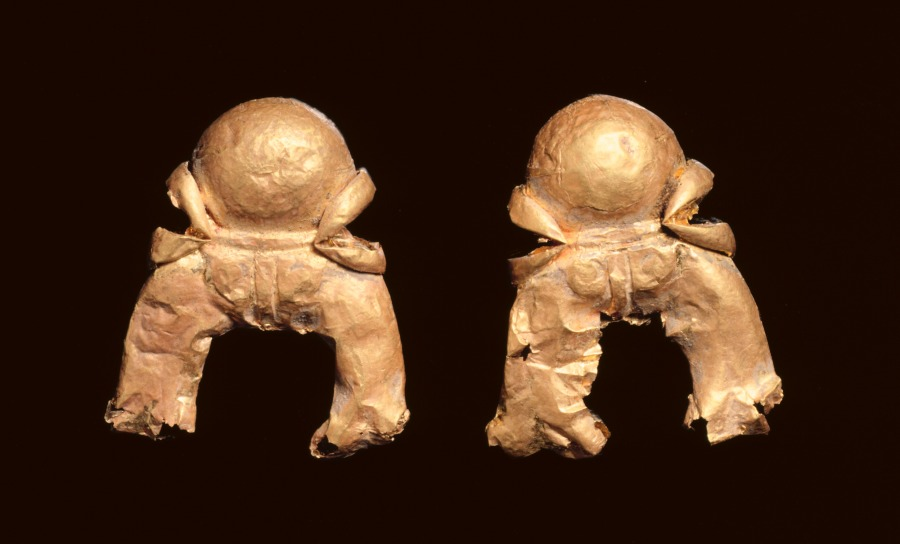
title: Pair of Pendants in the Shape of an Auspicious Symbol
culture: India, Shunga period (185–78 BCE)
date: 185–72 BCE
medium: gold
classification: Jewelry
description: These ornaments probably would have been strung on a long beaded necklace. The symbols are known by various names, including triratna, nandyavarta, and trishula. They are auspicious and reference creative, life-affirming energy.